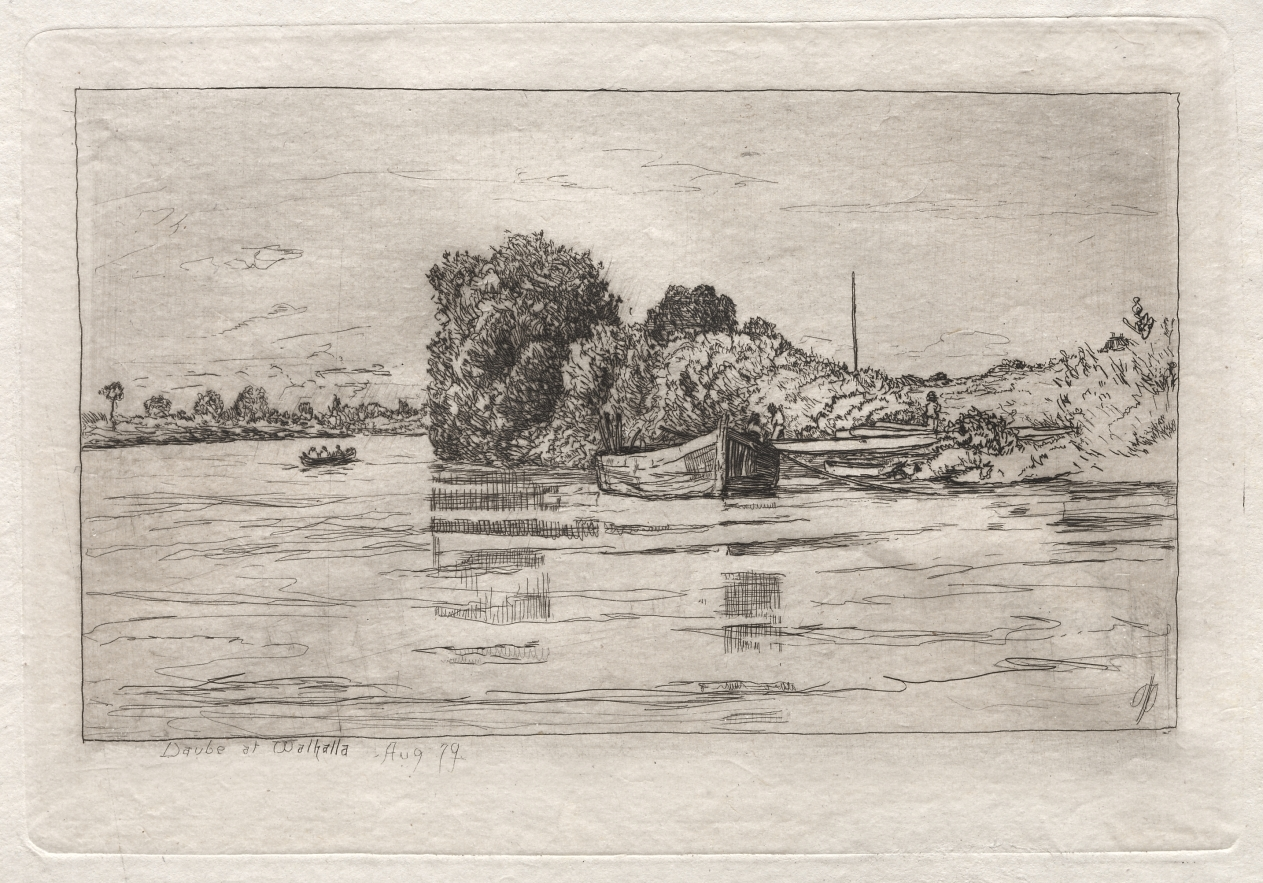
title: Danube at Walhalla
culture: America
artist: Otto H. Bacher (American, 1856–1909)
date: 1879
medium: etching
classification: Print